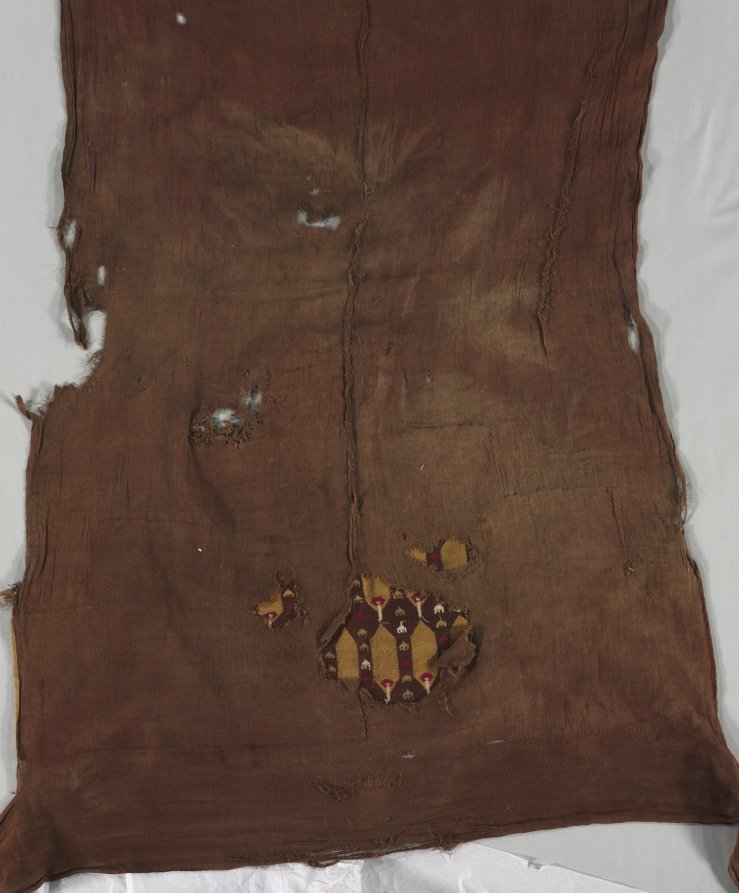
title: Loincloth with Feather(?) Motifs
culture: Peru, Central Andes, Chimú or Chimú-Inka, 11th-16th century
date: 1000–1532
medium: plain weave, tapestry weave; cotton, camelid fiber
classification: Textile